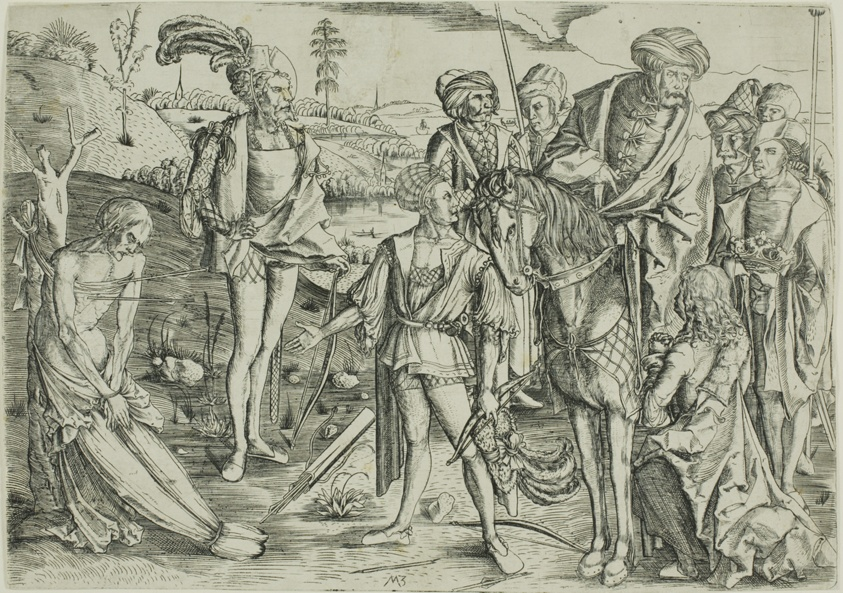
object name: Print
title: The King's Sons Shooting Their Father's Corpse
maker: Master M.Z.; German, active 1500-1550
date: c. 1500, printed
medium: Engraving in black on off-white laid paper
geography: Germany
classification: engraving; print; prints and drawing